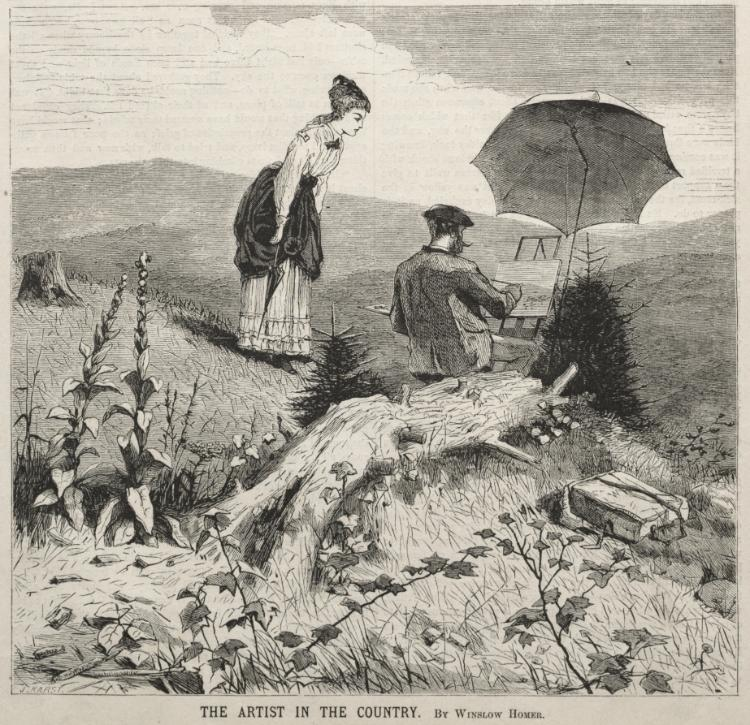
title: The Artist in the Country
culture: America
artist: Winslow Homer (American, 1836–1910)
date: 1869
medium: wood engraving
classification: Print